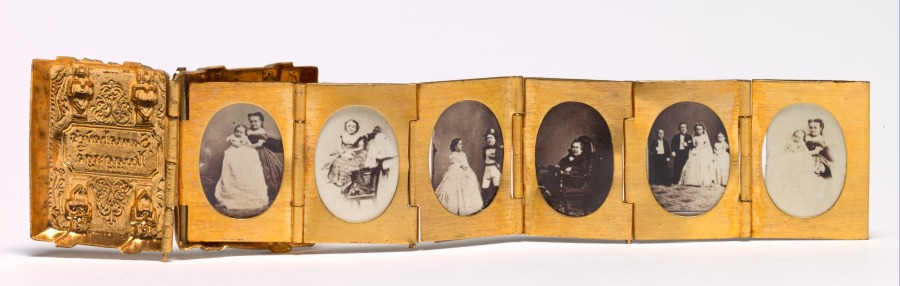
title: Somebody's Luggage (Miniature Wedding Album of Tom Thumb and Lavinia Warren)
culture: America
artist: Mathew Brady (American, 1823–1896)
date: c. 1863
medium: brass photographic locket with 12 miniature albumen prints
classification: Jewelry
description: This deluxe commercial souvenir commemorates the marriage of “General” Tom Thumb (Charles Sherwood Stratton) and Lavinia Warren, performers at P. T. Barnum’s American Museum. Thumb was such a celebrity that the wedding pushed the Civil War off newspapers’ front pages for days. Cartes-de-visite of the wedding sold in the thousands; Brady even licensed the image to lithographers and other photographers. In one image, Lavinia holds a baby who was borrowed for the photo shoot to suggest her domestic skills. The locket is shaped like a miniature suitcase bearing the words “Somebody’s Luggage,” the title of an 1862 story by Charles Dickens.